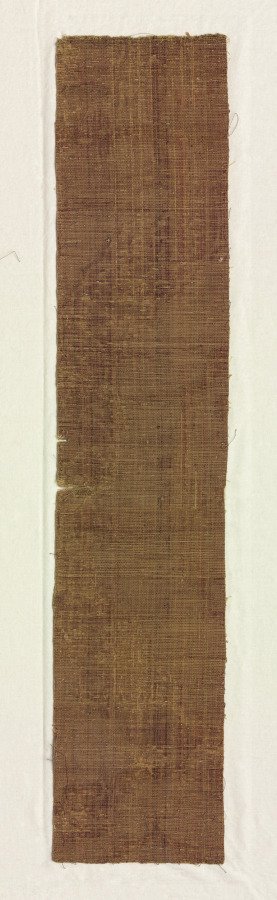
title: Fragments from Chasuble Front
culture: Italy, early 16th century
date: early 1500s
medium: velvet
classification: Velvet